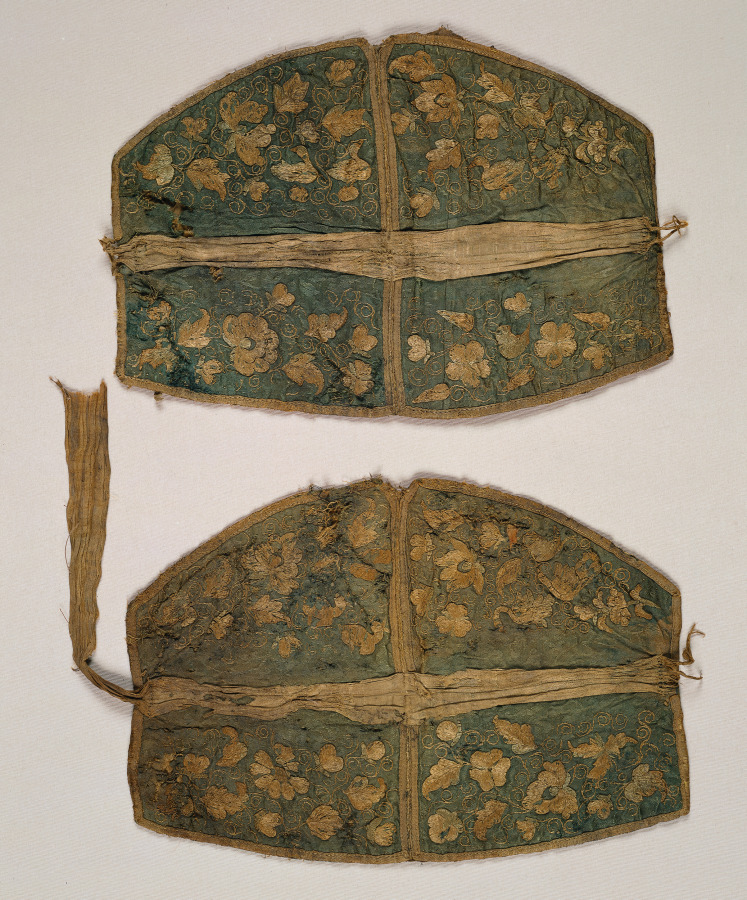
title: Pair of Headpieces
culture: China, Liao dynasty (907-1125)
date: 907–1125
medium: embroidery, silk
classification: Embroidery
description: These headpieces are embroidered with butterflies, birds, animals, flowers, leaves, and delicate vine scrolls. In general, the design is related to the theme of the lotus pond, best known from Liao tomb paintings. Paired ducks or geese swimming in water and looking in opposite directions seem to have become popular in the north of China before spreading further south and to Central Asia. On the other hand, recumbent animals looking back are a Central Asian image that migrated to northern China. Headpieces of this shape, intersected by two bands and secured by ties, have a long history in northern China. A gold replica was found in a tomb dating as early as 500–550.